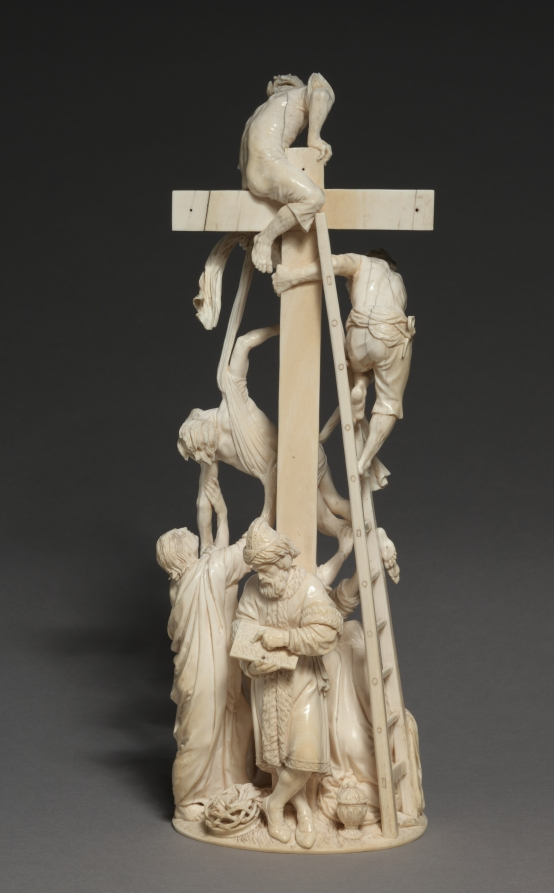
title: Descent from the Cross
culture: Austria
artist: Adam Lenckhardt (German, 1610–1661)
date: 1653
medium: ivory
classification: Sculpture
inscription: inscribed with monogram "AL" conjoined and dated 1653.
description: Carved from a single piece of ivory for Prince Karl Eusebius von Liechtenstein of Vienna, this work is a true tour-de-force. It took Lenckhardt seven years to complete; it is his last known sculpture and the pinnacle of his career. The biblical accounts of the descent from the cross found in the gospels are not consistent, which may contribute to the difficulty in precisely identifying the figures. The Virgin Mary, Saint John, Mary Magdalene, and others were said to be present, but undoubtedly there are other disciples here mourning Christ’s death. The intense emotion registers on the faces of the figures in the scrupulous and exquisitely detailed work.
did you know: Carved from a single elephant tusk, the artist took special care to ensure the ivory did not crack or break as he meticulously crafted each figure in this visually exciting sculpture. Look closely to find tools and small objects included near its base.